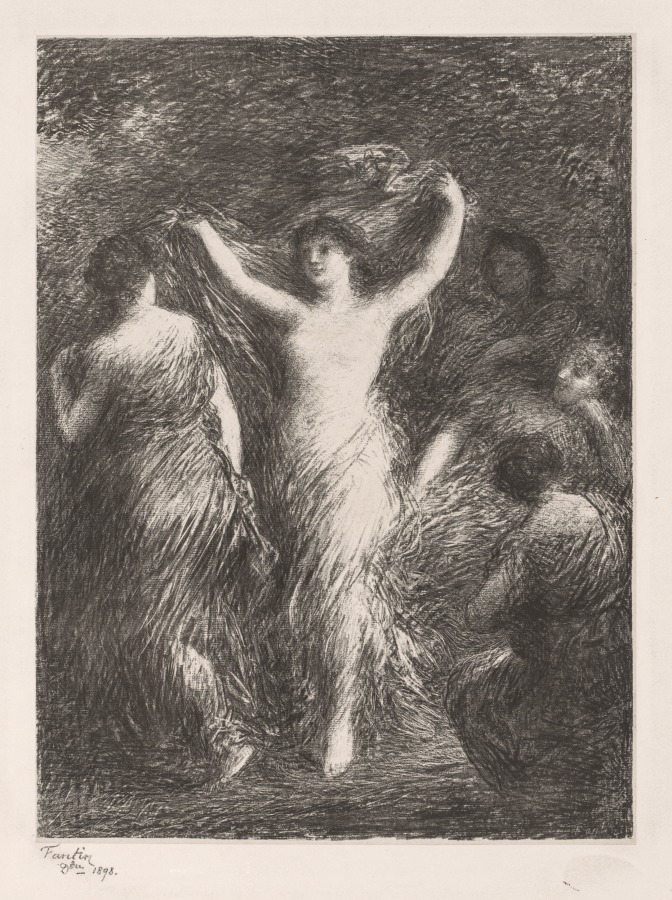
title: Dancing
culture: France, 19th century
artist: Henri Fantin-Latour (French, 1836–1904)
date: 1898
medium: lithograph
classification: Print